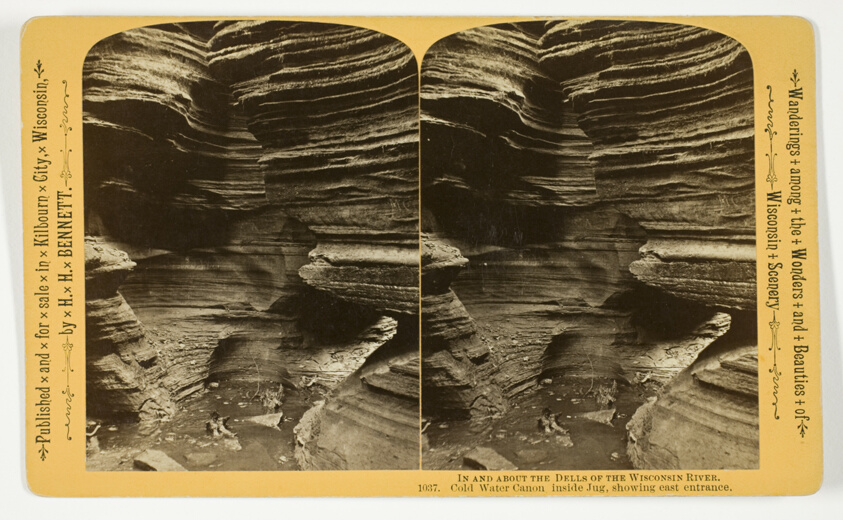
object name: Photograph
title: Cold Water Canon inside Jug, showing east entrance, No. 1037 from the series "In and About the Dells of the Wisconsin River"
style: 19th century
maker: Henry Hamilton Bennett (American, born Canada, 1843-1908)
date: 1870/1908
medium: Albumen print, stereo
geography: Wisconsin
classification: photography; photograph; albumen silver print; stereograph (albumen)